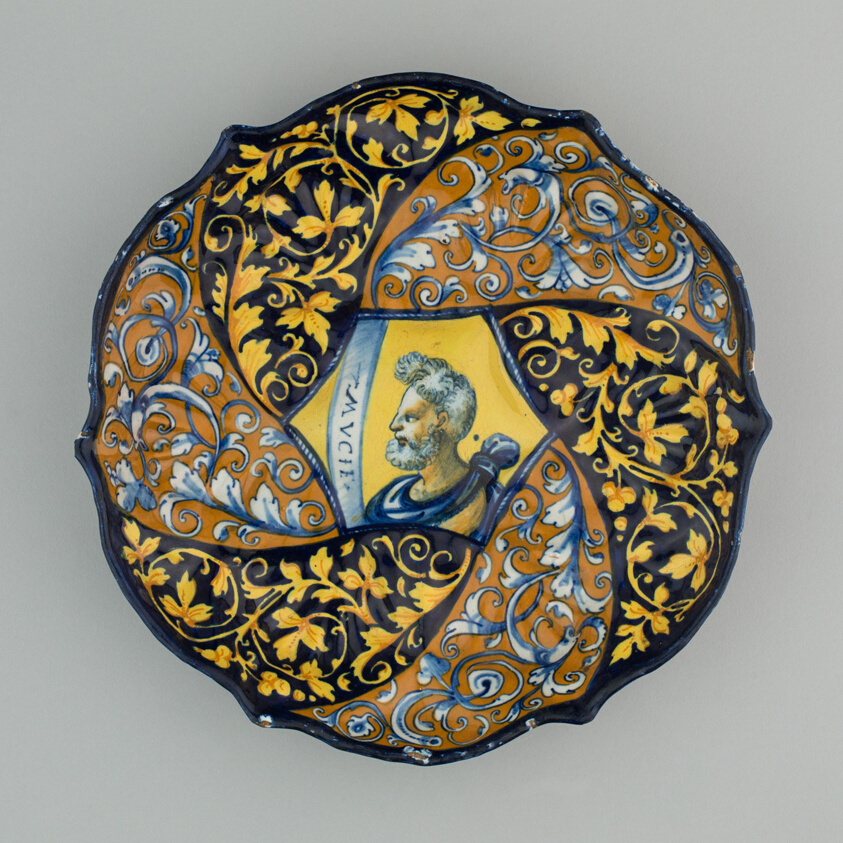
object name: Ceramics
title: Bowl with a Bust of Mucius Scaevola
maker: Italian; Faenza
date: 1535/45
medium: Tin-glazed earthenware (maiolica)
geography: Faenza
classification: earthenware; european decorative arts; ceramics; decorative arts